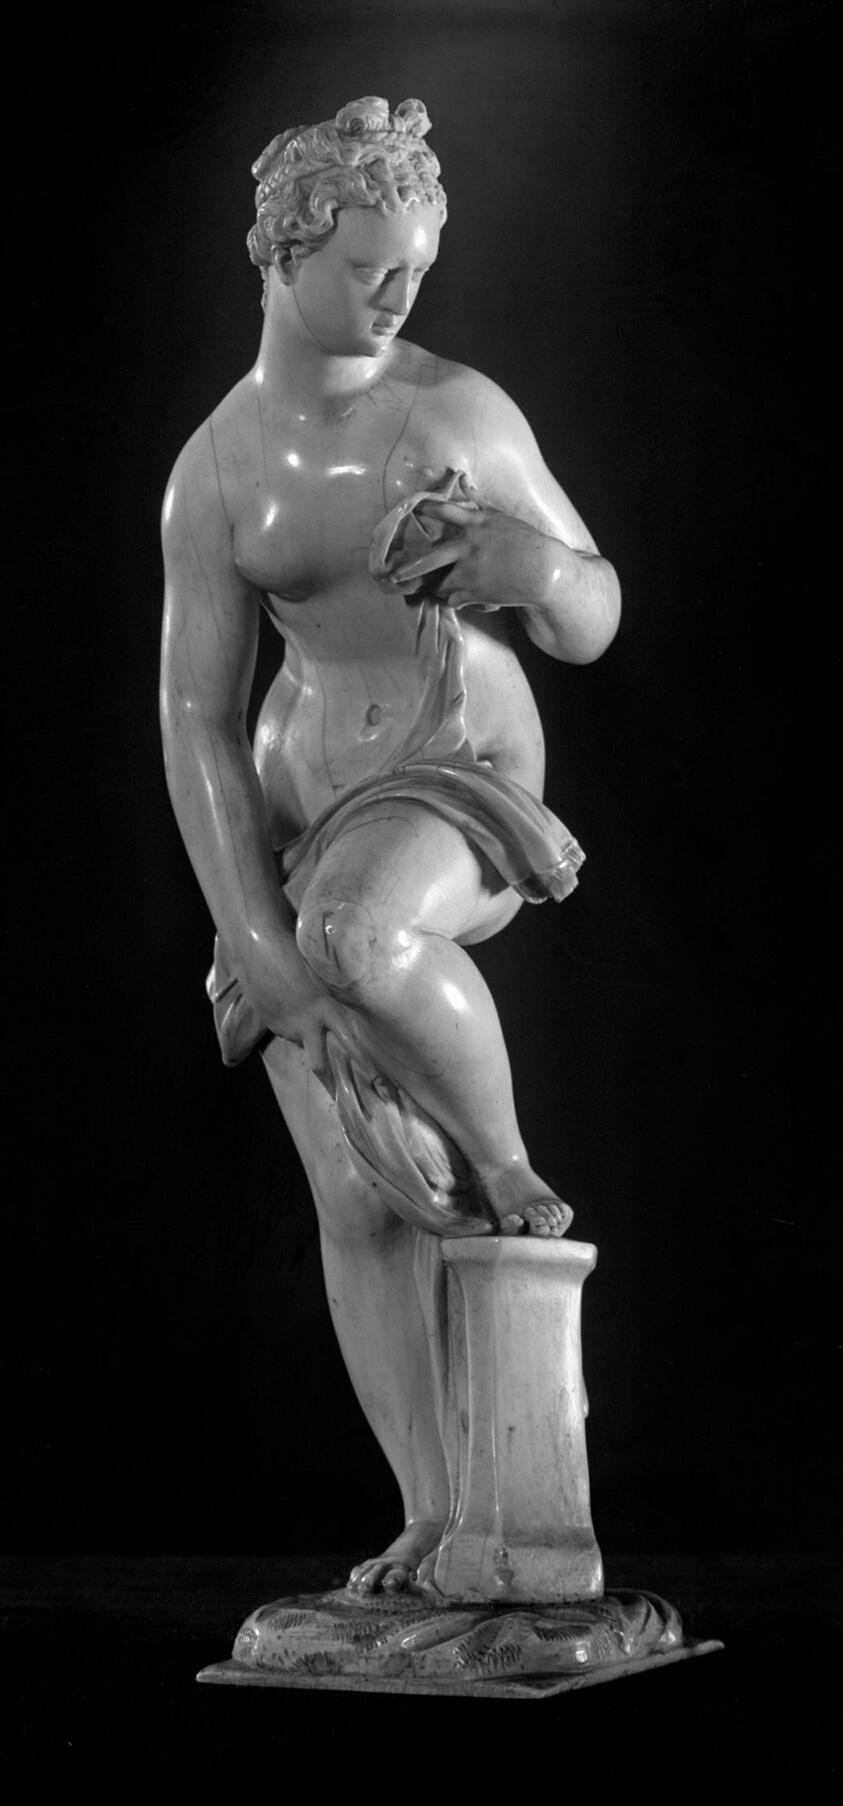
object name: Sculpture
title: Woman Bathing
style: 17th Century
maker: After a design by Giambologna (Flemish, 1529–1608)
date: 1600/50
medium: Ivory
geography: Flanders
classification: statuette; ivory; sculpture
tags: bathers, woman, textile, pedestals, nudes, figure, cloth